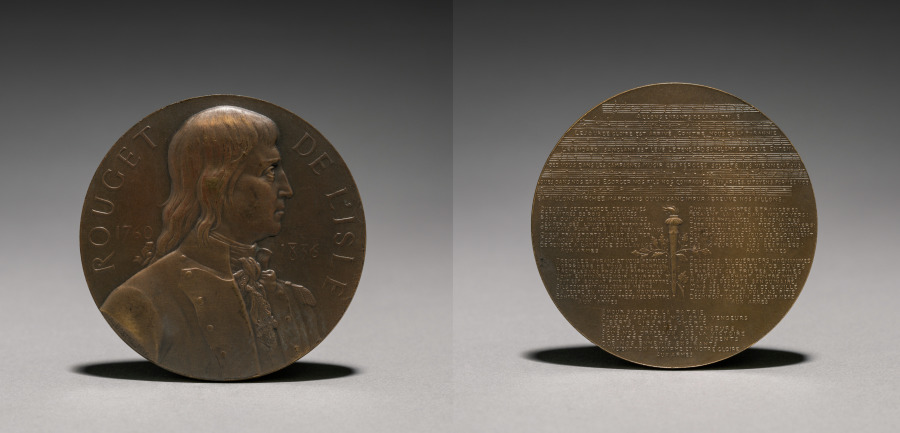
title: Medal of Claude Joseph Rouget de L'Isle (1760-1836)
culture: France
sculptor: Alfred Borrel (French, 1836–1927)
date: 1911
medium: bronze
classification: Metalwork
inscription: Obverse: raised inscription: ROUGET DE L'ISLE 1760 1836; inscribed lower left: A. BORREL Reverse: [score and all verses of "La Marseillaises"]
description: The French sculptor and medalist Alfred Borrel (1836-1927) created this portrait medal to commemorate the 75th anniversary of Rouget de L'Isle's death in 1836, the same year in which the sculptor was born.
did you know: Claude Joseph Rouget de L'Isle composed the French national anthem, La Marseillaises, in 1792 in Strasbourg after France had declared war on Austria.